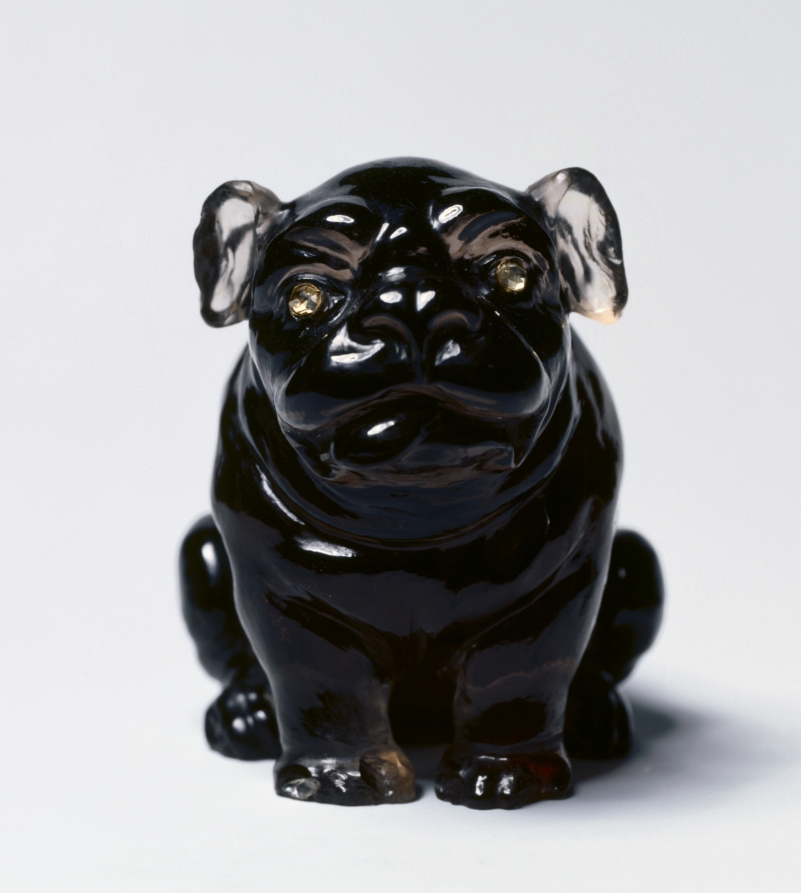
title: Bulldog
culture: Russia, St. Petersburg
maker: House of Fabergé (Russian, 1842–1918)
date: c. 1895–1915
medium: amethystine quartz, diamonds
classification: Miscellaneous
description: In creating luxurious accessories for a desk or tabletop, the House of Fabergé often used native hardstones such as multicolored agate and jasper, green nephrite, pink rhodonite, quartz, and rock crystal found in the Ural Mountains of western Russia. By paying careful attention to the unique colors and textures of the stones, Fabergé and his craftsmen brought them to life, turning smoky quartz into this figure of a seated bulldog, for example. The use of native materials also promoted Russian nationalism, which appealed greatly to the tsar and his family.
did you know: Fabergé's lapidaries carefully chose the stones to resemble the color and texture of the figure they were sculpting. The smoky quartz used for this bulldog was polished to resemble his dark shiny coat.